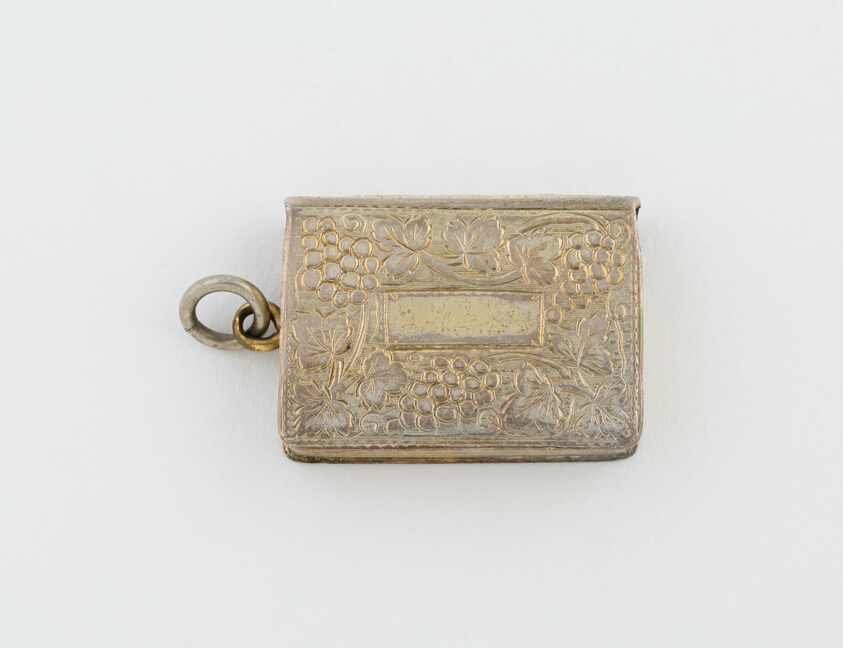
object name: Metalwork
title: Book-Shaped Vinaigrette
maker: Samuel Pemberton (Birmingham, England)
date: c. 1818/19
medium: Silver and silver gilt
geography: Birmingham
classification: container for personal use; vinaigrette (container for health care); european decorative arts; metalwork; silver; decorative object/ornament